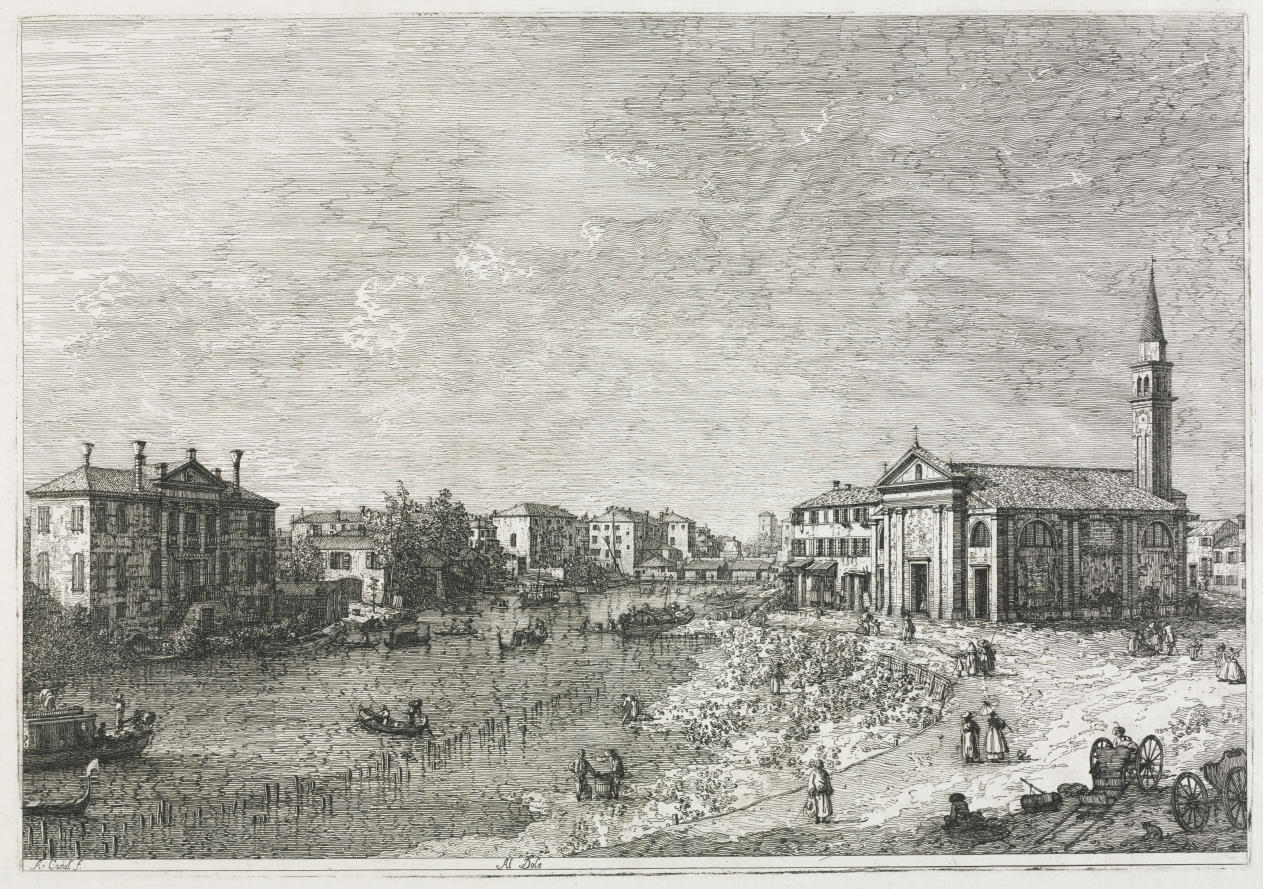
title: Views: View of Dolo, A Town on the Brenta, West of Venice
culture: Italy, Venice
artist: Antonio Canaletto (Italian, 1697–1768)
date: 1735–1746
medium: etching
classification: Print